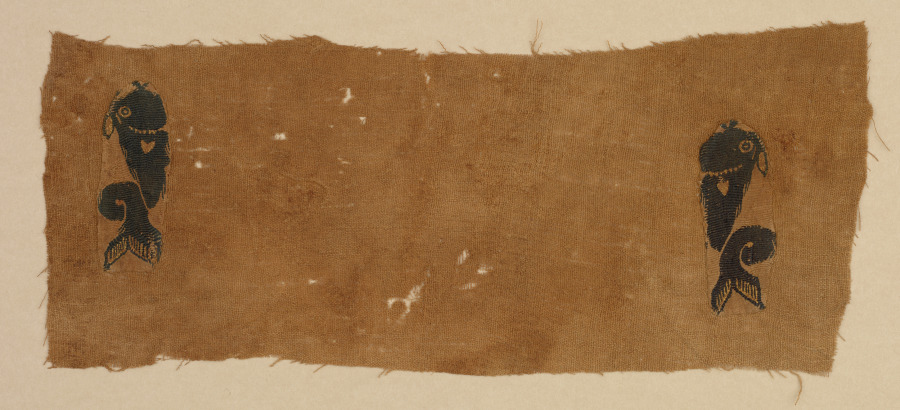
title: Two Fragments from a Curtain: Dolphins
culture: Egypt, Byzantine period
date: 400s - 500s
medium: tapestry (originally inwoven in tabby ground); wool, linen and gold filé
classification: Textile